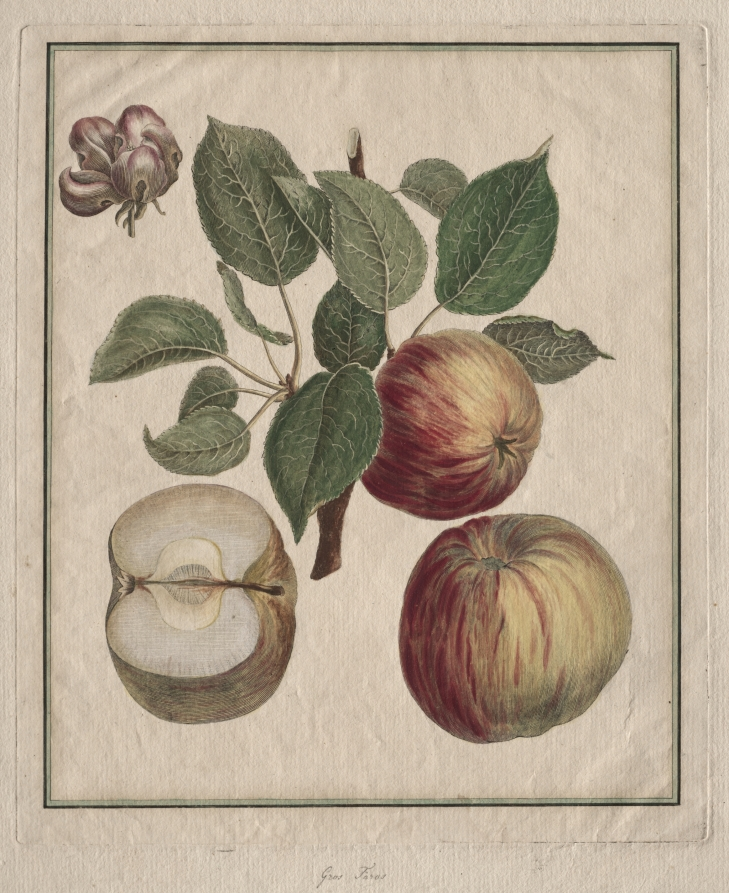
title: Apple with Leaf and Fruit Blossom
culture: France, 18th century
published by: Henri Louis Duhamel du Monceau (French, 1700–1782)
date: 1768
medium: etching and engraving, hand colored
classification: Print